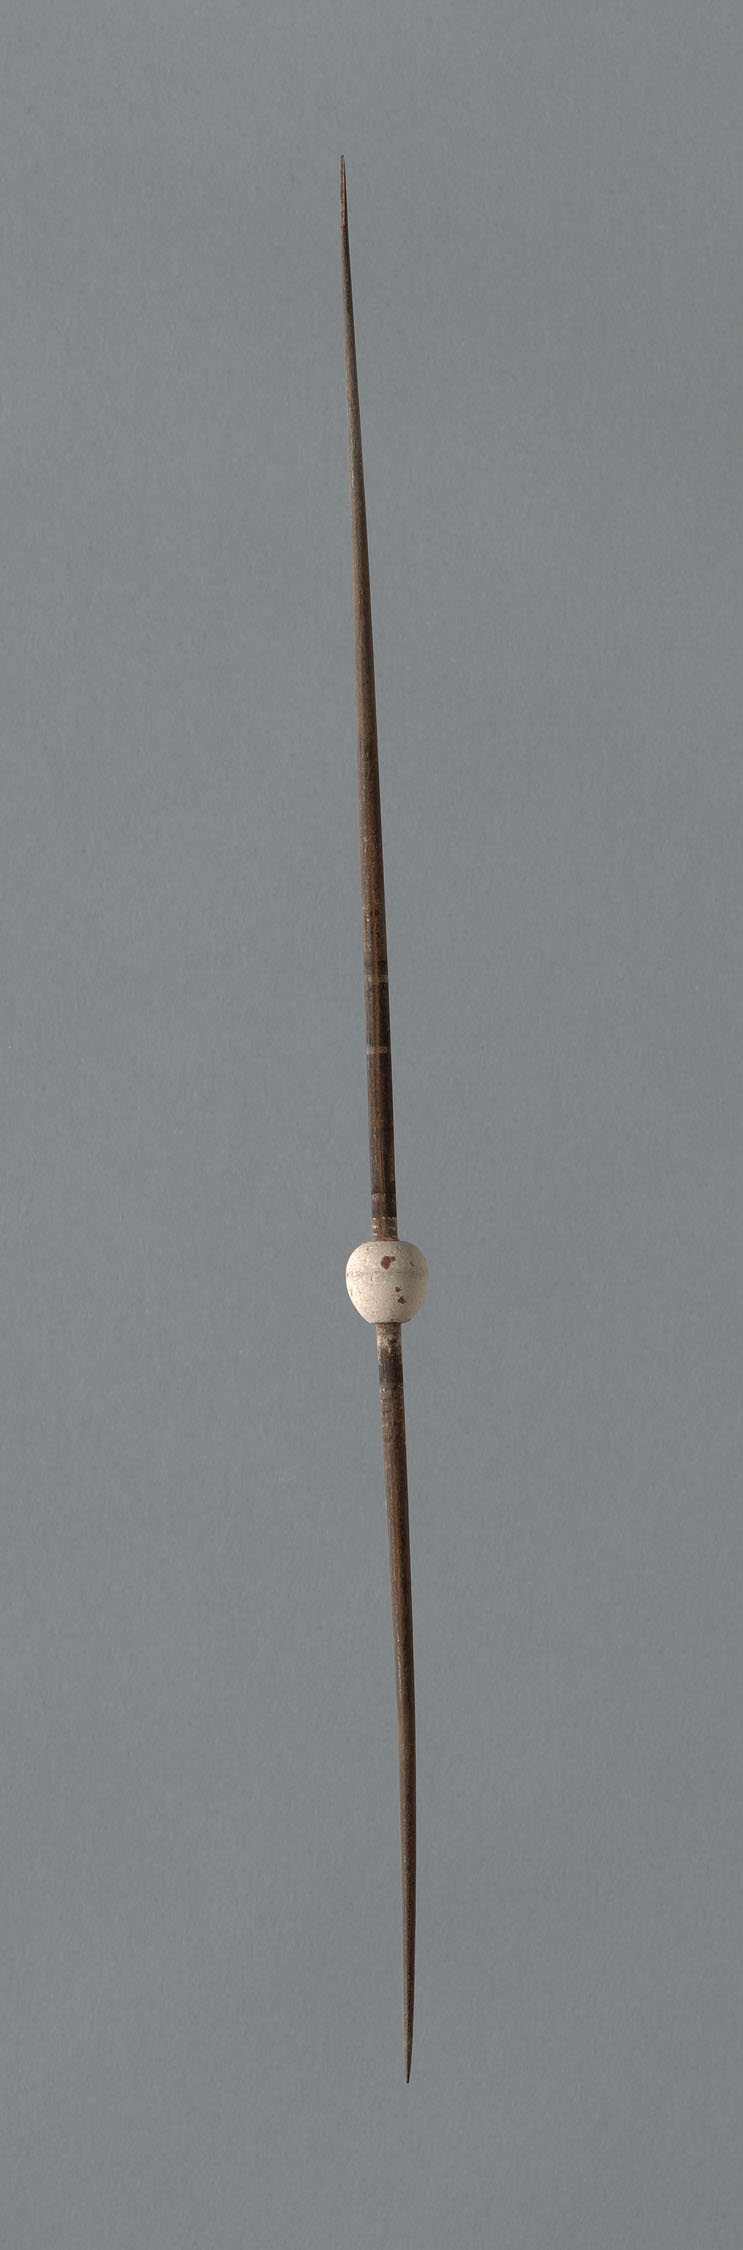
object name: non-art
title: Wooden Spindle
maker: Peru, Possibly central coast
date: 1000/1476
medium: Wood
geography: Peru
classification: spindles (textile working equipment); textile working equipment; accessories (object genre); textile